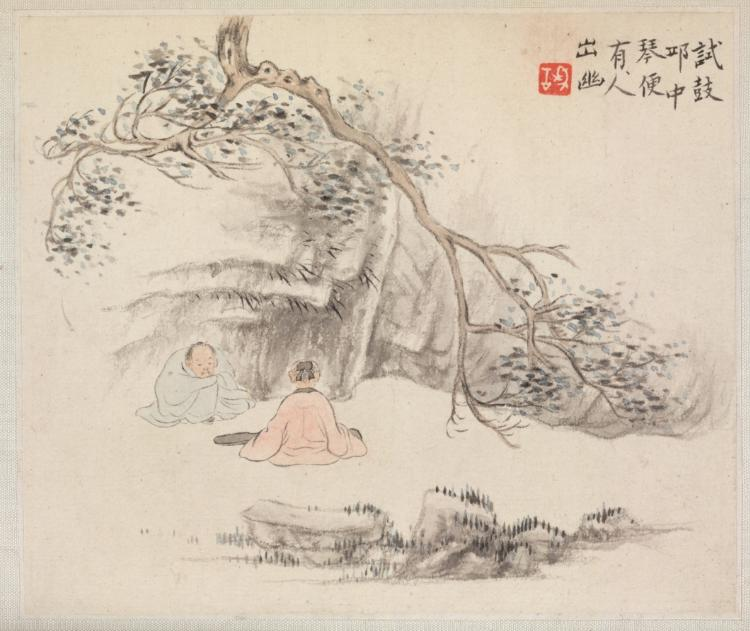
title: Album of Landscape Paintings Illustrating Old Poems: Listening to the Qin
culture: China, Qing dynasty (1644–1911)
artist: Hua Yan (Chinese, 1682–c. 1765)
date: 1745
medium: album leaf; ink and light color on paper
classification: Painting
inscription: 試鼓邱中琴，便有人出幽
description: The figure in pink is playing a qin, a seven-stringed zither. The sound of the musical instrument symbolizes the harmony between humanity and nature; literati are often depicted playing qin in landscape settings.